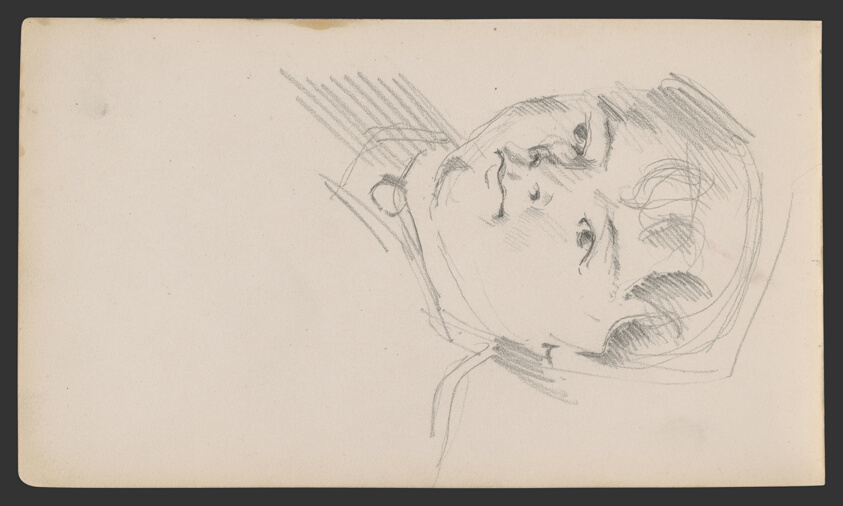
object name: Drawing and Watercolor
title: Sketchbook No. 2 (L'Estaque)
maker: Paul Cézanne; French, 1839-1906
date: 1875–86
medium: Graphite and pen and ink drawings on paper, bound into a book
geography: France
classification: sketchbook; graphite; prints and drawing; paper